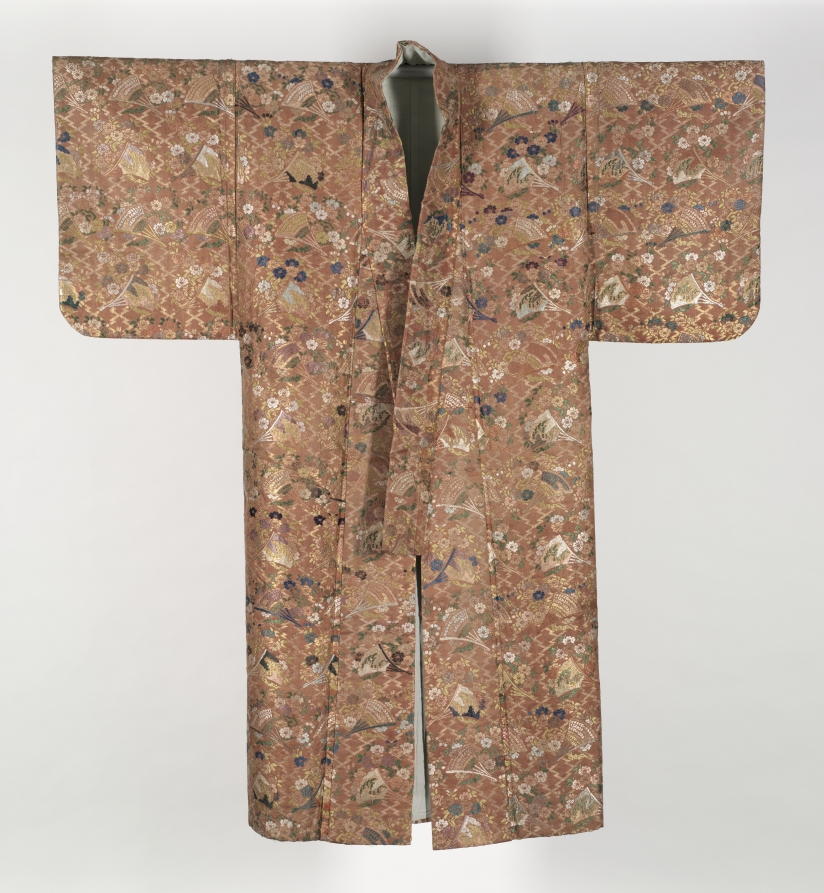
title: Noh Robe (Karaori)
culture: Japan, Edo period (1615–1868)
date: 1800–1850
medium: silkwith supplementary weft, brocaded; metal thread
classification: Garment